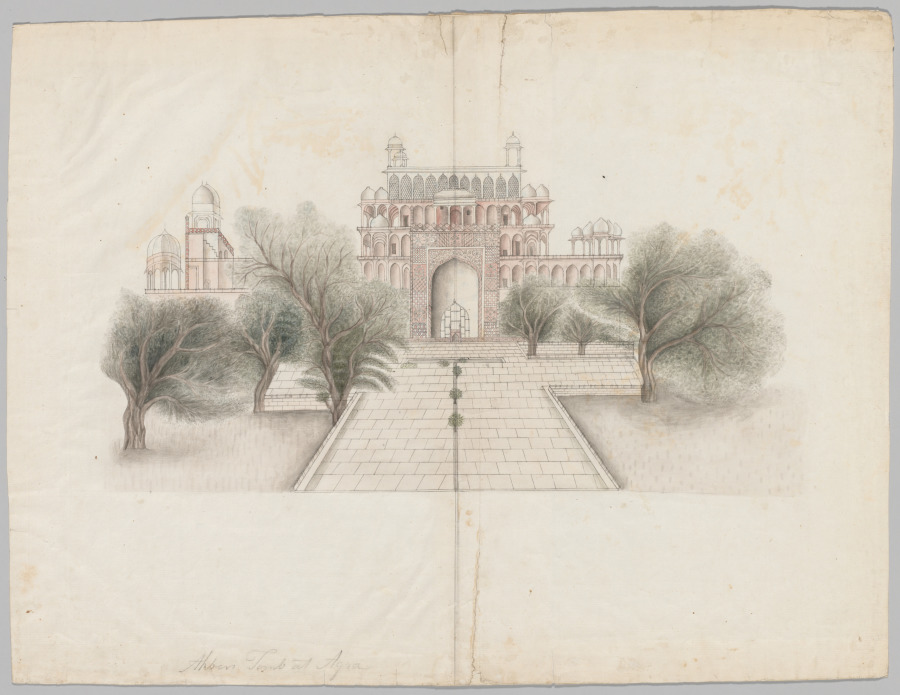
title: The Mausoleum of Akbar at Secundrabad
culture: India, Company School, early 19th century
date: early 1800s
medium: watercolor on paper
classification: Drawing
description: Before the invention of photography, British travelers in India collected watercolor sketches of monuments and picturesque scenes. This tomb near Agra marks the burial place of one of India’s most illustrious rulers, the Mughal emperor Akbar (1542–1605). In reality it is dominating in scale and ornamented with complex geometric and floral motifs articulated in multicolored stone inlays, relief carvings, and paintings. In this sketch, the site has been rendered in the muted tones that appealed to British taste of the time, and its ornament has been reduced and simplified, giving little indication of its grandeur.